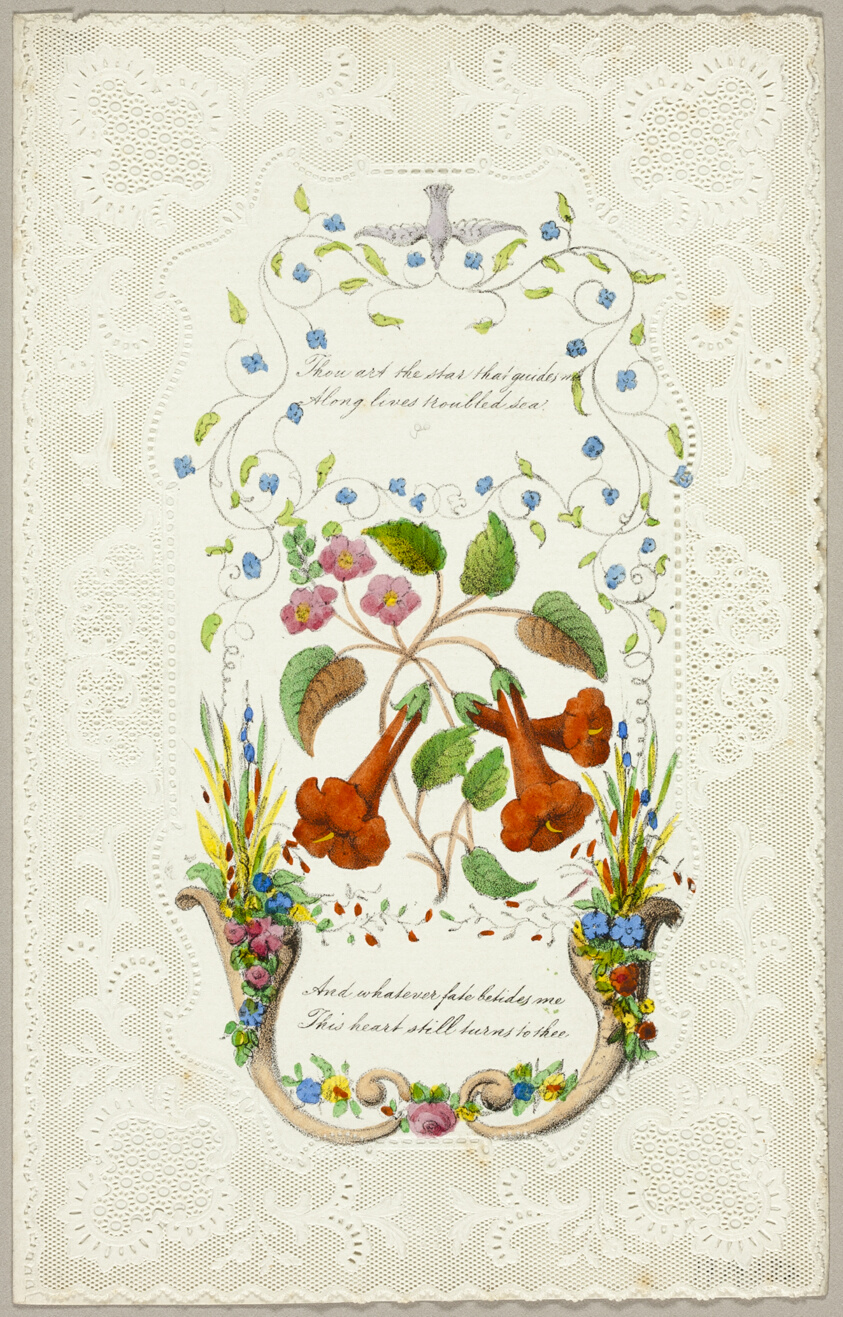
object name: Print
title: Thou Art the Star that Guides Me (valentine)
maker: Joseph Addenbrooke (English, 19th century)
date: c. 1840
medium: Lithograph with hand-coloring on cut and embossed ivory wove paper (lace)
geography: England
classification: valentine; prints and drawing; print